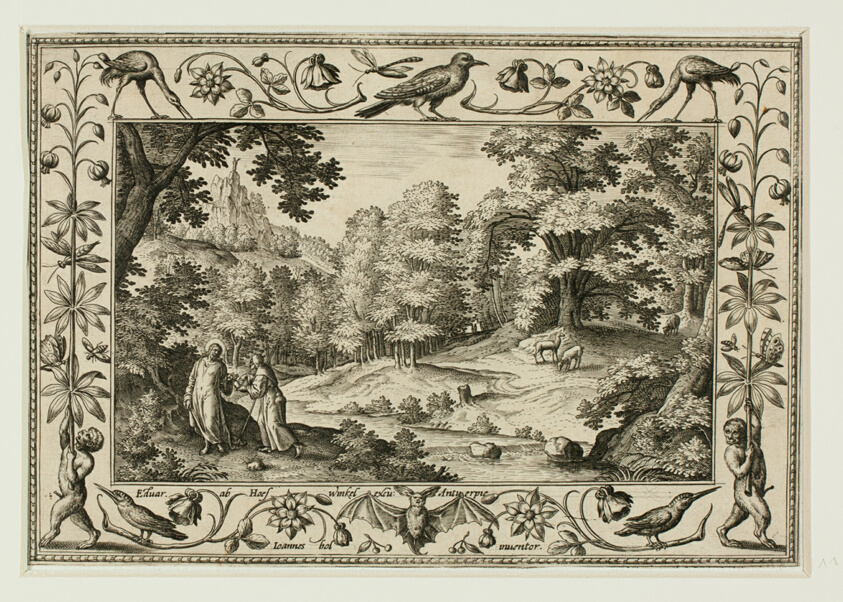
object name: Print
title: The Temptation of Christ, from Landscapes with Old and New Testament Scenes and Hunting Scenes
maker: Adriaen Collaert (Flemish, c. 1560–1618); after Hans Bol (Flemish, 1535–1593); published by Anna van Hoeswinckel (Flemish)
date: 1584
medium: Engraving in black on cream laid paper, laid down on cream laid paper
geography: Flanders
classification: engraving; paper; print; prints and drawing